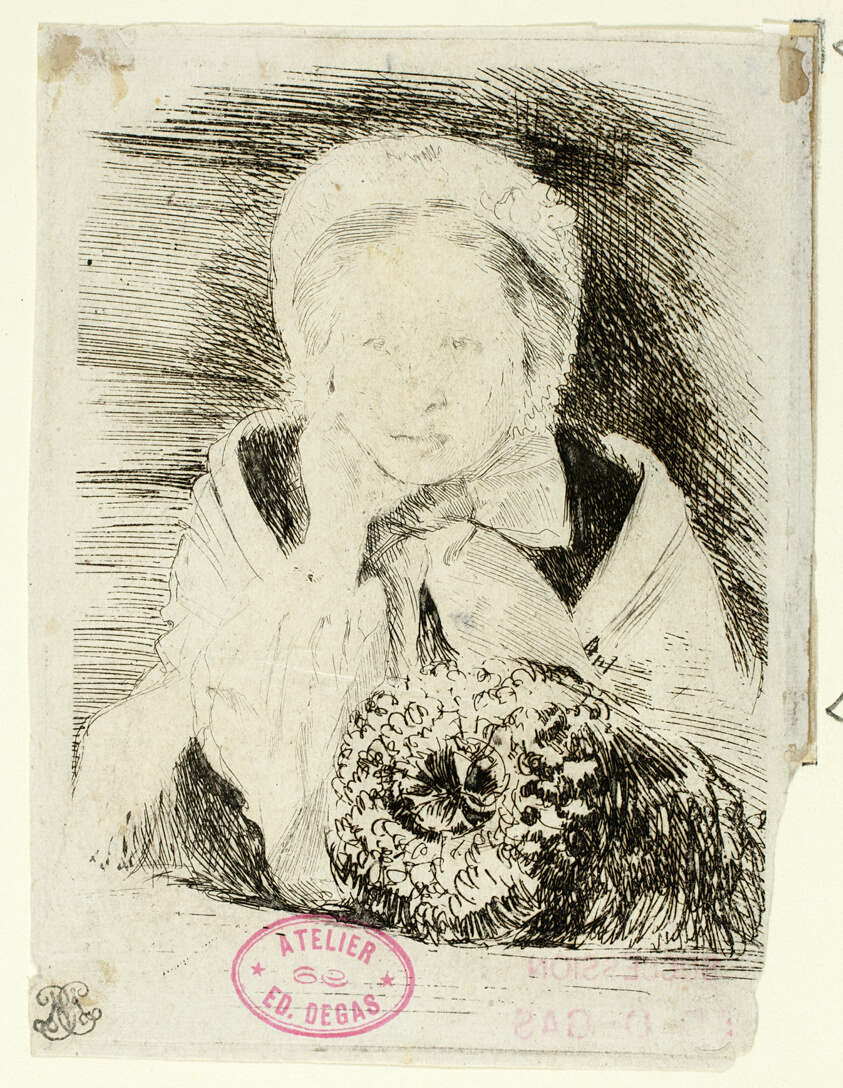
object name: Print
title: Marguerite Degas, the Artist’s Sister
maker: Edgar Degas; French, 1834-1917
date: 1860/62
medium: Etching in black on ivory laid paper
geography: France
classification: etching; paper; print; prints and drawing